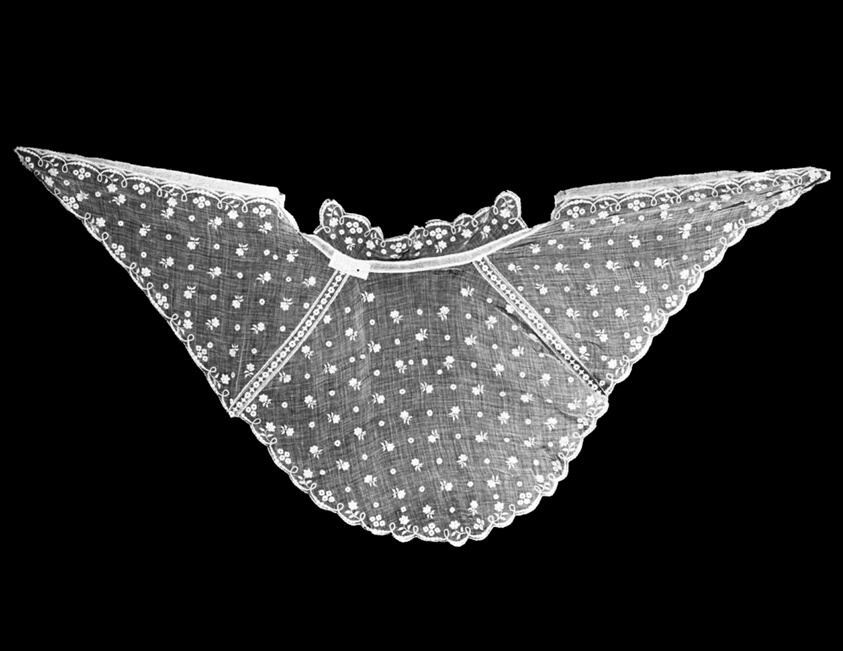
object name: Textile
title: Collar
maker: England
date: 19th century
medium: Cotton, plain weave; embroidered with cotton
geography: England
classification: textile; needlework (visual works); costume; dress (garment); clothing